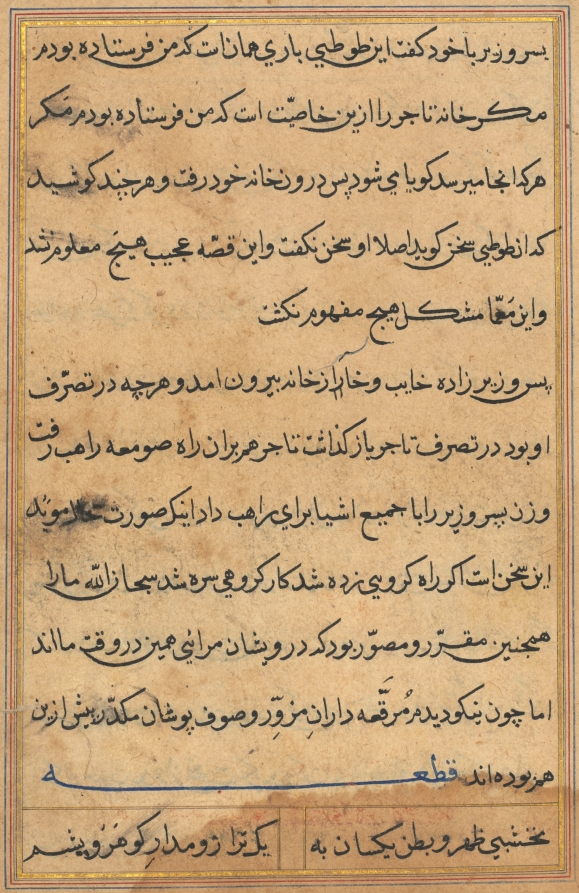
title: Page from Tales of a Parrot (Tuti-nama): text page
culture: Mughal India, court of Akbar (reigned 1556–1605)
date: c. 1560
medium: gum tempera, ink, and gold on paper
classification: Painting